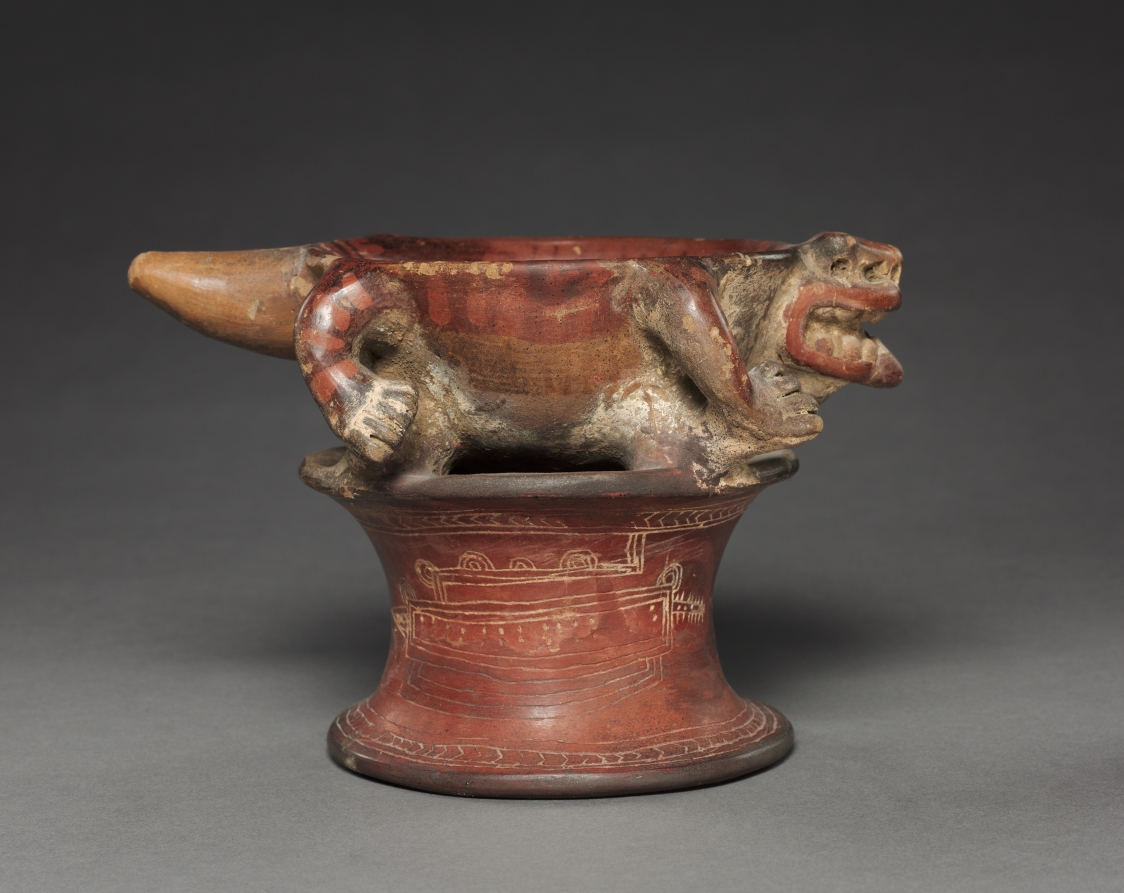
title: Jaguar Bowl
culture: Colombia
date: c. 850–1500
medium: resist-painted earthenware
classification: Ceramic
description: Probably from the southern highland region of Colombia, this unusual vessel has a bowl in the form of a comically fierce jaguar, mounted atop a pedestal base.